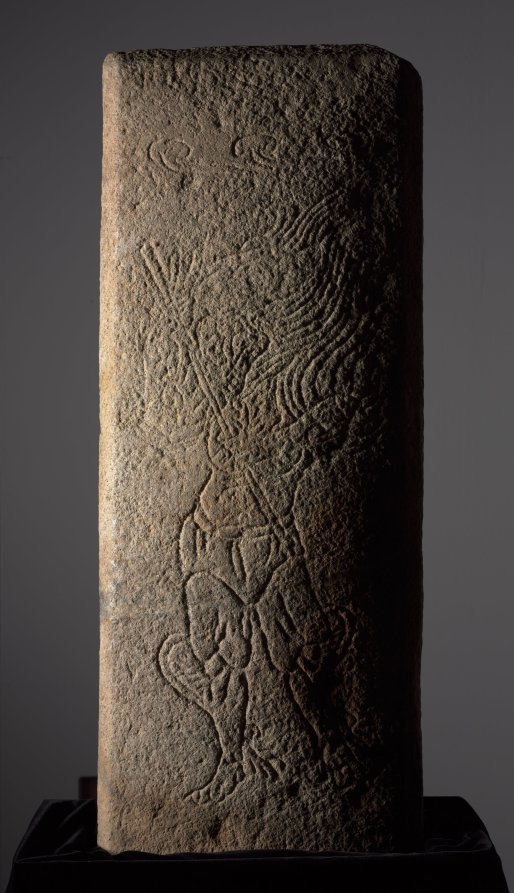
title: Stone Panel for Royal Tomb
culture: Korea, Unified Silla period (676-935)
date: late 700s-early 800s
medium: granite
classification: Sculpture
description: This panel shows a figure with a human body and the features of a rat, which is one of the signs of the Asian zodiac, and is likely one of 12 granite panels from a royal tomb. It is probably from Gyeongju—the capital of the kingdoms of the Silla (57 BCE–668) and Unified Silla (688–935) periods—where large royal tomb mounds can still be found. This panel resembles those showing the animal signs of the Korean zodiac from the tomb of General Kim Yusin (595–673) in Gyeongju, the most famous tomb of the period.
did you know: A rat, one of the signs of the East Asian zodiac, carved in this stone panel symbolizes wealth.